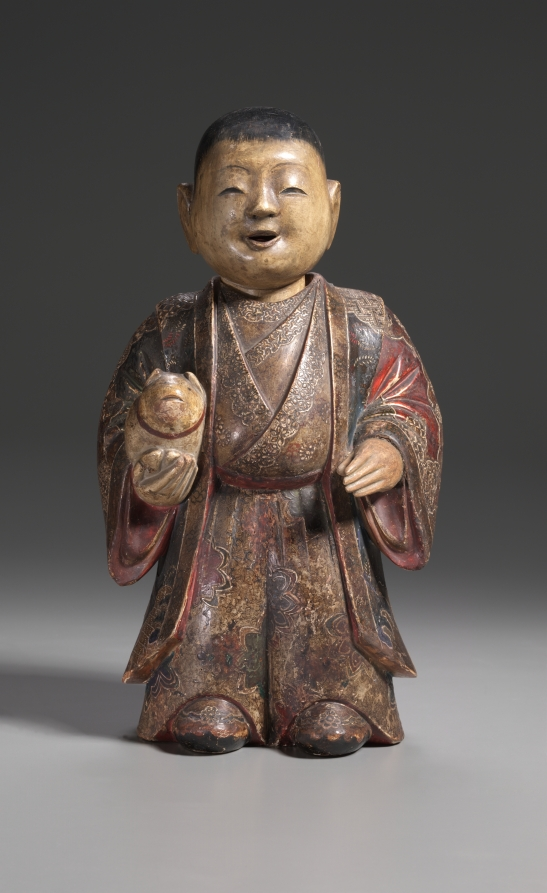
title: Boy with Puppy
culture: Japan, Edo period (1615–1868)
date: c. 1800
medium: wood with lacquer and color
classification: Sculpture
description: This is a Saga doll, a type of doll thought to have originated in 16th-century Saga, outside of Kyoto. The colors and patterns of the doll’s robe resemble the fashion of the latter part of the Momoyama period (1573–1615). The doll is a nodder, with its head carved separately; when its head moves, its tongue sticks out.